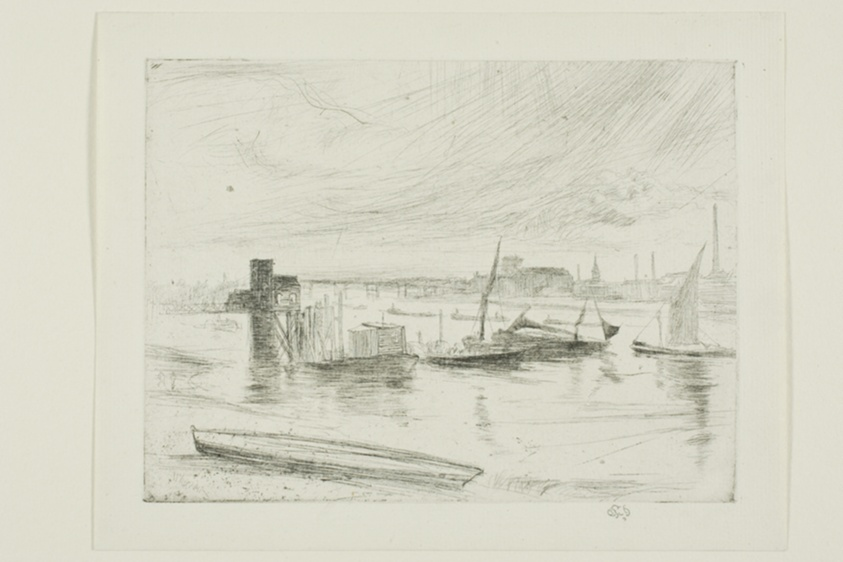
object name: Print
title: Battersea Dawn (Cadogan Pier)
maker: James McNeill Whistler (American, 1834-1903)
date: 1861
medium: Etching and drypoint with foul biting in black ink on ivory laid paper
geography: United States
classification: etching; foul biting; print; prints and drawing; drypoint; paper